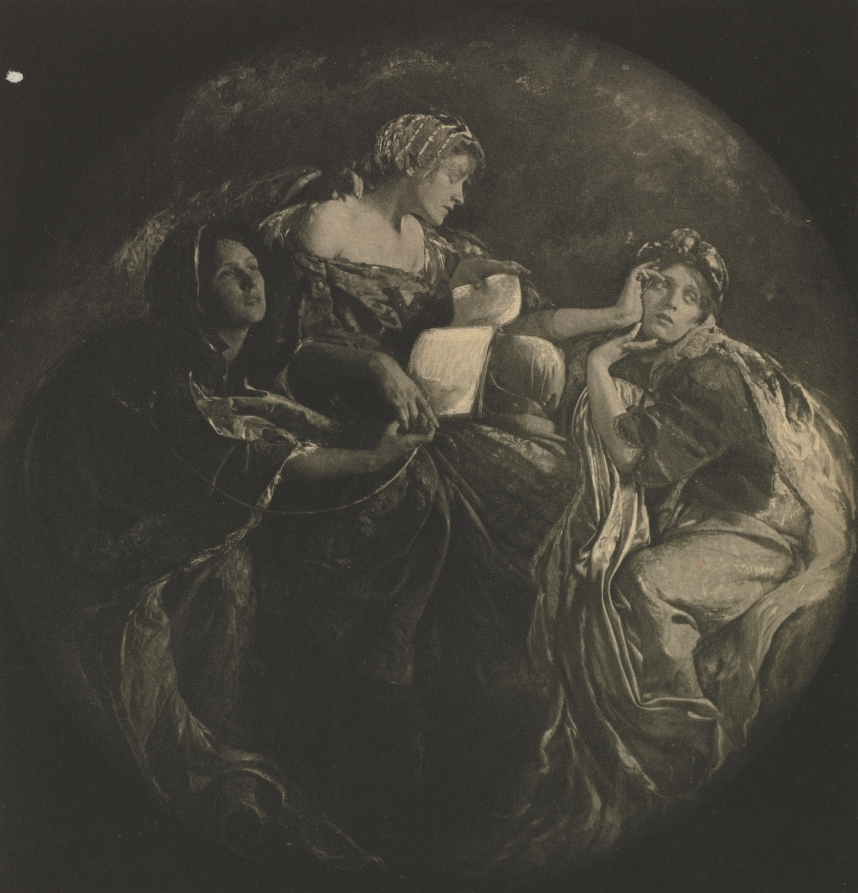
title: Camera Work: The Tale of Isolde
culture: America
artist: F. Benedict Herzog (American, c. 1859–1912)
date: 1905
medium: photogravure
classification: Bound Volume